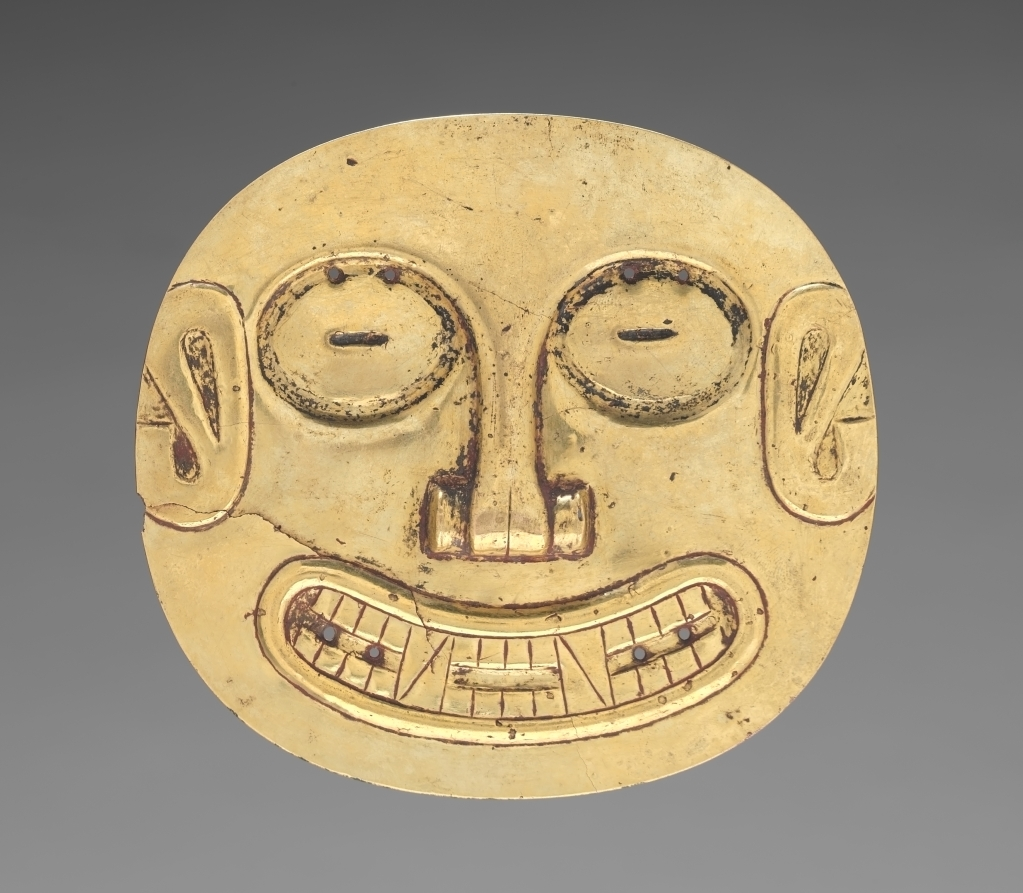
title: Ornament from Sitio Conte: Small Plaque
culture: Panama, Conte style, 5th - 10th century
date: c. 400–500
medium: hammered gold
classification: Metalwork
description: Harvard archaeologists excavated this and seven other ornaments from several burials at Sitio Conte, a cemetery famous for its lavish graves of powerful chieftains. The young man buried in Grave 26 was such a chief. His status was stunningly memorialized by 21 human companions and 475 objects, many of them personal ornaments made of gold, including this large chest plaque and a rod-shaped ear ornament. The creature on the chest plaque, found close to the chief’s body, has reptile claws and perhaps the head crest of an iguana. Its meaning is unknown but perhaps, as in later periods, reptilian imagery and the warm gleam of gold linked rulers with the sun’s creative force.